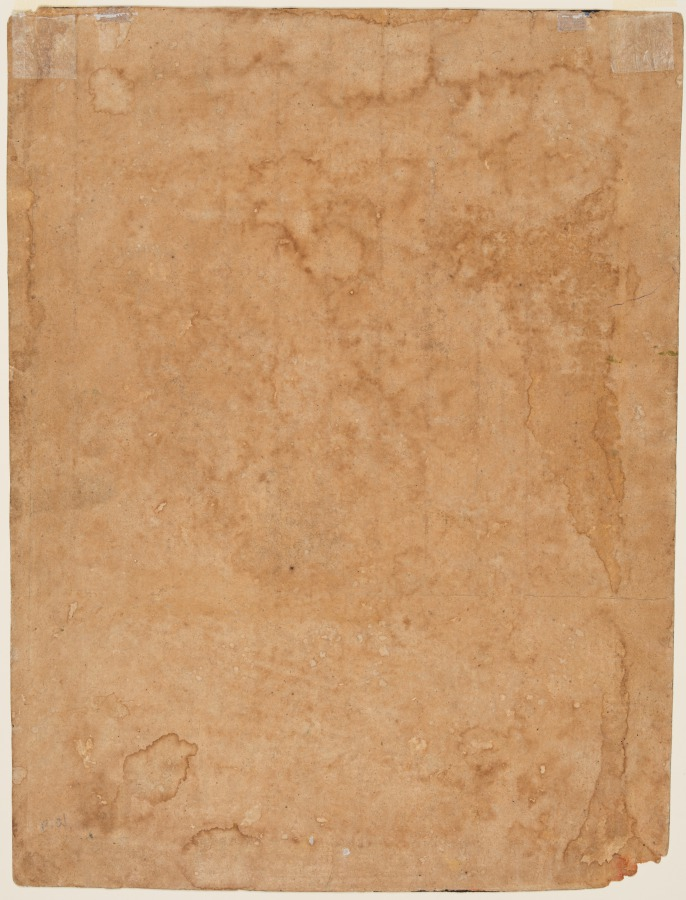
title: Devi Enshrined and Holding the Tongue of a Demon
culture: Northwestern India, Rajasthan, Rajput Kingdom of Sirohi; or Northern Deccan, Aurangabad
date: c. 1725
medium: gum tempera, gold, and silver on paper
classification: Painting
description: This enigmatic painting remains unidentified. Set in a forest teeming with wildlife, a four-armed goddess with three eyes and a crescent moon in her crown shows her dominance over a naked, ashen male figure standing to her left by clutching his tongue. In her right hands, she appears to hold agricultural implements, while in her upper left hand she holds a mace.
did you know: His spiky hair standing on end suggests that the naked figure is a demon.